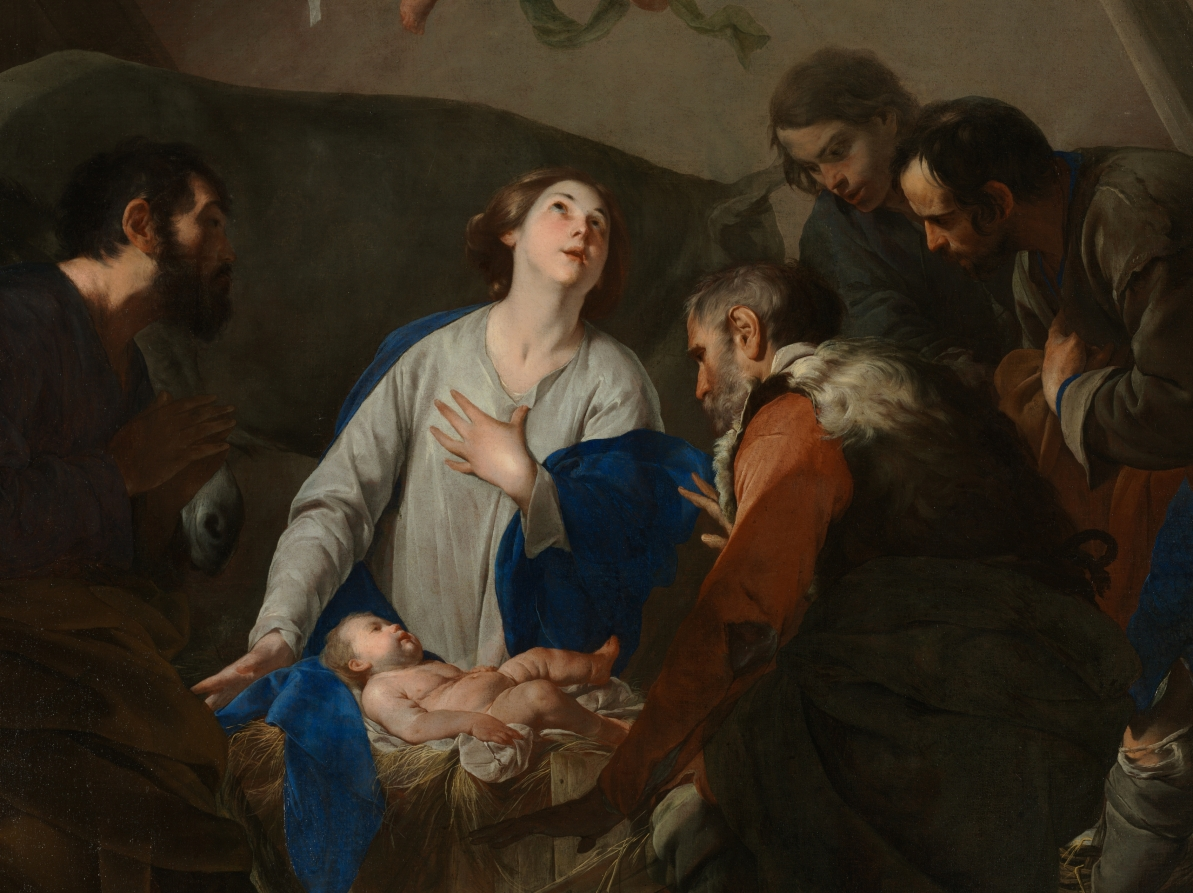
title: Adoration of the Shepherds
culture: Italy, 17th century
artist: Bernardo Cavallino (Italian, 1616–1656)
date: c. 1650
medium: oil on canvas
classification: Painting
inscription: Signed left on ox: "BC [monogram]"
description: Cavallino worked in Naples where he was not well known during his lifetime, but was alert to the work of contemporaries whose innovations he transformed with extraordinary delicacy and charm. The adoration of the shepherds is a traditional subject, but here Cavallino shows it in a new light. The focus is on Mary, indicating that she alone is aware of the angels who flutter above with ribbons proclaiming Gloria in Excelsis Deo (Glory to God in the highest). Joseph and the shepherds stolidly regard the child, but the sweetness of Mary's expression simultaneously reveals her love, pride, and humility.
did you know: The artist signed this painting with his monogram “BC” on the rump of the ox.